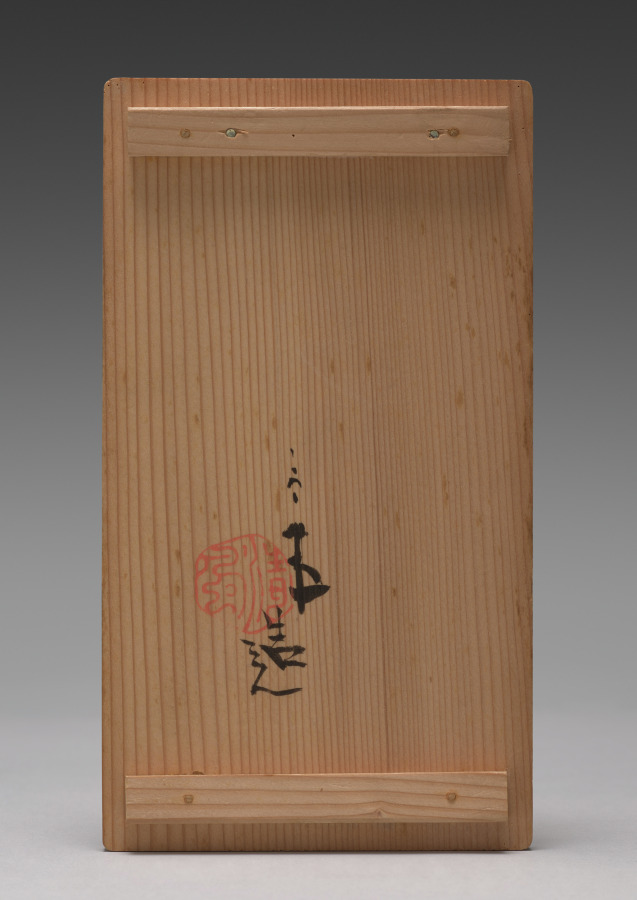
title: Boat-Shaped Bowl with Plovers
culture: Japan, Meiji period (1868–1912)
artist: Seifū Yohei III (Japanese, 1851–1914)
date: 1893–97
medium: Stoneware with crackled glaze and overglaze color enamel and gold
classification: Ceramic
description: Overglaze color enamels create a seascape made complete by the bowl’s boat shape. The bowl’s form inserts a human presence into the scene, much in the way rusu mōyō is used in paintings to suggest people just out of view. Rusu mōyō is a pictorial device by which the presence of someone physically absent from an image is conveyed through the depiction of clothing or other items. The inside of the bowl has a scene of plovers flying through the sky over a profusion of seaweed in sand below. In addition to the black, gray, and green of the overglaze elements, warm pink banding and mottling in the clay come through the glaze and are remarkably effective at suggesting the seashore.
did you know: On the outside of the bowl, on each side, birds fly about grasses in search of a meal.